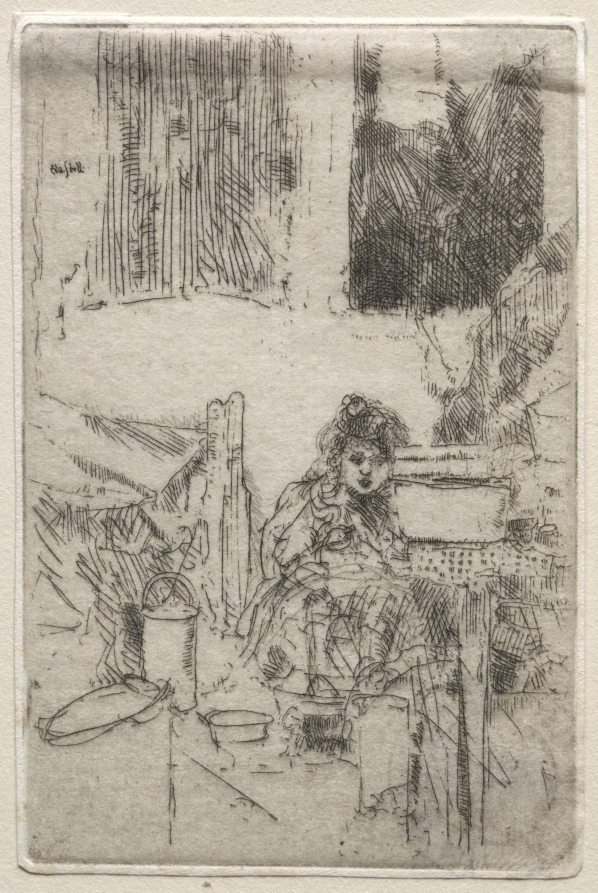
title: Paris: The Rag Picker's Child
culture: America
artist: Ernest Haskell (American, 1876–1925)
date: 1910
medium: etching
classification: Print